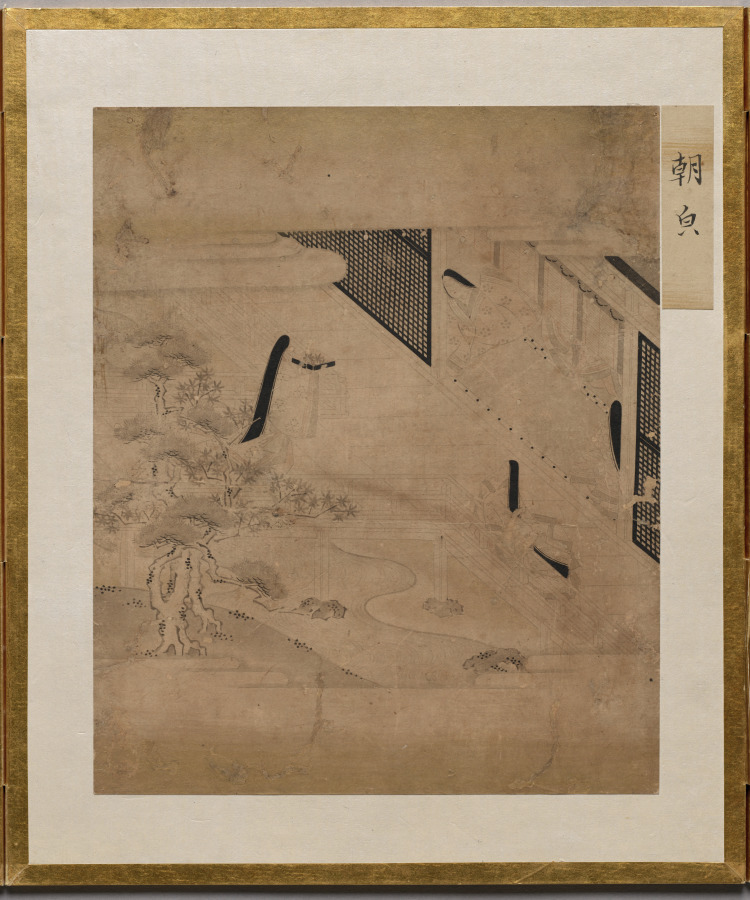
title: Morning Glory from Album of Illustrations for the Tale of Genji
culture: Japan, Edo period (1615–1868)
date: 1600s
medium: painting in an accordion-style album; ink, light color, and gold on paper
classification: Bound Volume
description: This album contains illustrations for the classic literary work the Tale of Genji, authored in the 1000s by Murasaki Shikibu, an aristocrat of the Heian period (794–1185) court. The scenes are painted in the “white drawing” (hakubyō) mode, in which a fine ink line is used to depict figures and spaces with great subtlety, punctuated only occasionally by traces of red pigment for a character’s lips, a detail of a garment, or a decorative element. These two scenes illustrate episodes from the chapters “Thin Veil of Cloud” (Usugumo) and “Barrier Gate” (Sekiya).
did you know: The illustrations are identified by chapter title in cartouches to the upper right of the paintings.